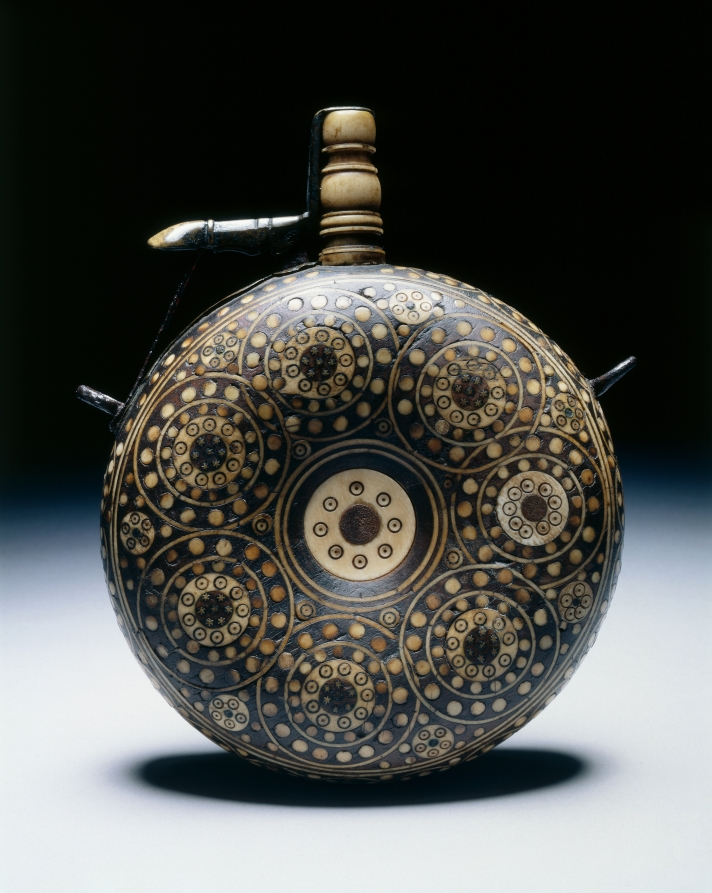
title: Powder Flask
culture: Germany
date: c. 1620–1650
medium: walnut inlaid with horn in concentric circles; turned bone funnel with brass spring cap; iron suspension loops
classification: Arms and Armor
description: Powder flasks are small, portable containers designed to hold gunpowder. From the 1400s to the 1800s, powder flasks were indispensable for charging and priming firearms of all types. Without powder flasks firearms were of little use to their owners. Many highly decorated flasks rank as works of art.